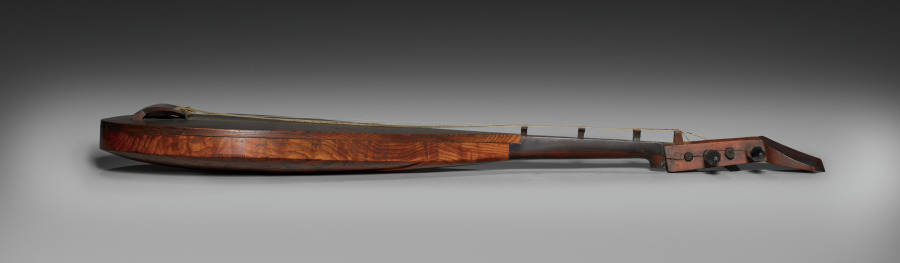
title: Heike Biwa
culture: Japan, Meiji period (1868–1912)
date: c. 1850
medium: Wood, bone, silk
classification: Musical Instrument